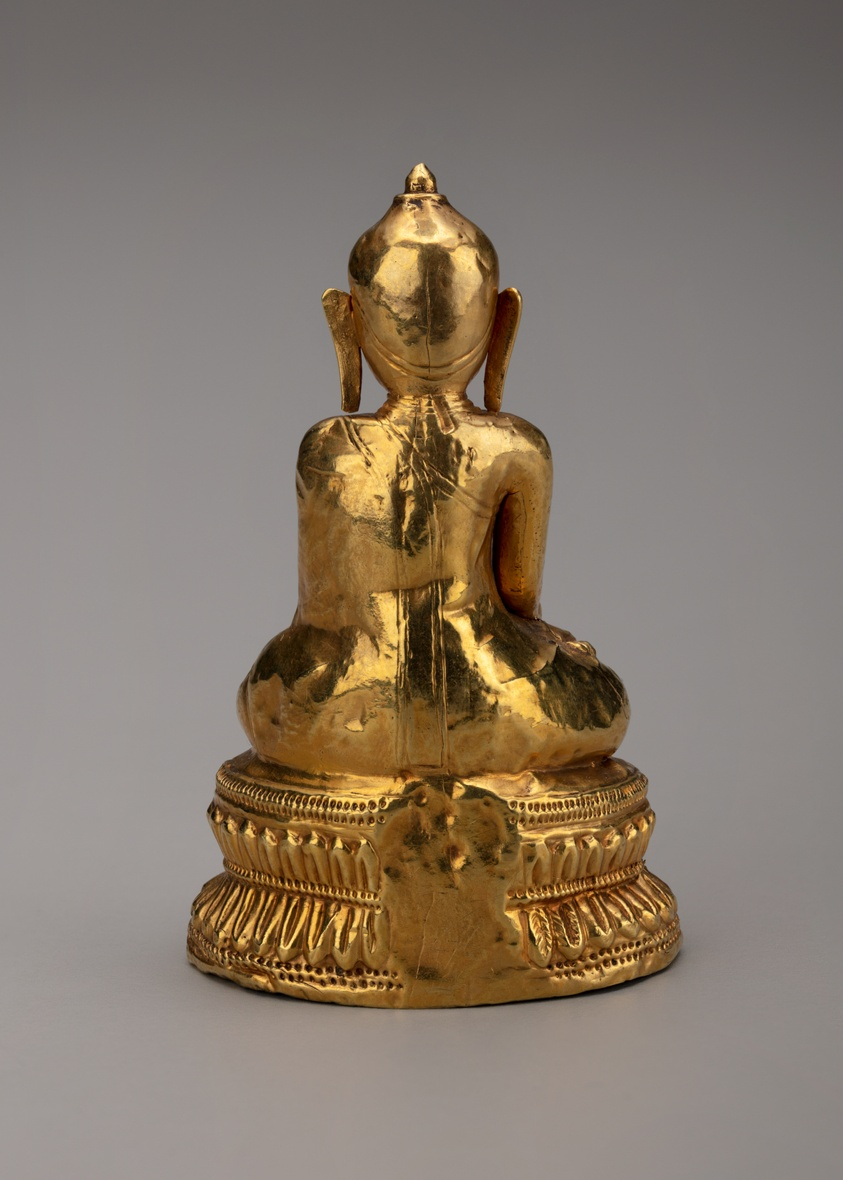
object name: Sculpture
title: Buddha Triumphing over Mara (Maravijaya)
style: Southeast Asian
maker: Thailand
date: 18th/19th century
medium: Gold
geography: Thailand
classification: gold; metal; sculpture; asian art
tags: Buddha